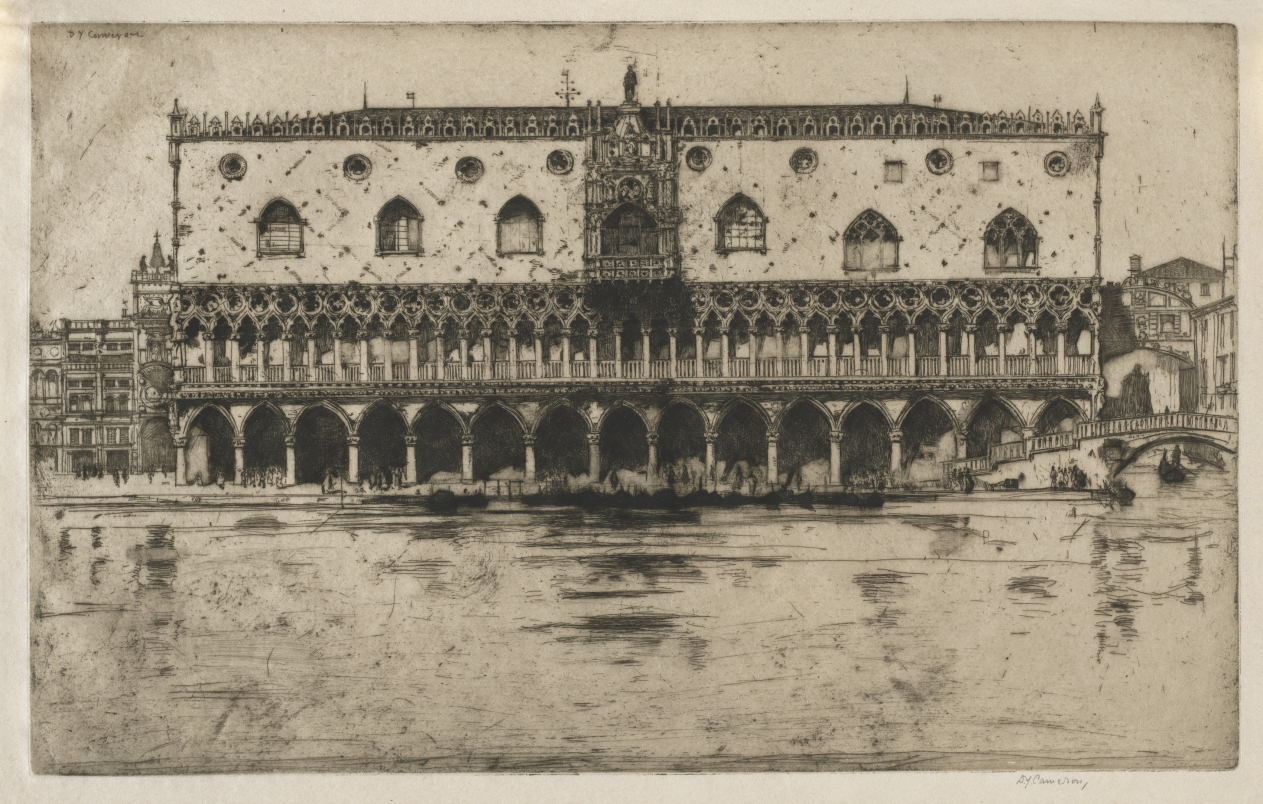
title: Doge's Palace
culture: England, early 20th Century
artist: David Young Cameron (British, 1865–1945)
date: 1902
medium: etching and drypoint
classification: Print